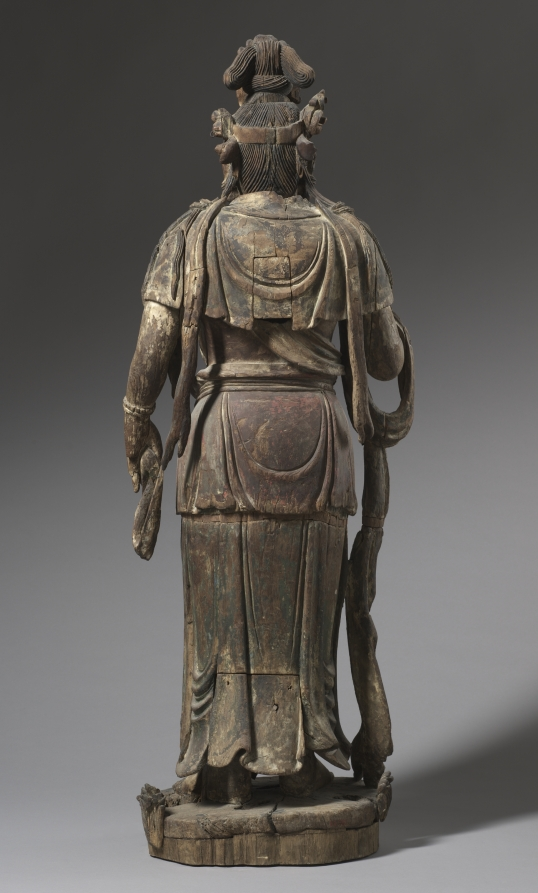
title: Standing Bodhisattva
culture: China, Jin dynasty (1115-1234)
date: 1200s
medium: wood with traces of polychromy and gold leaf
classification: Sculpture